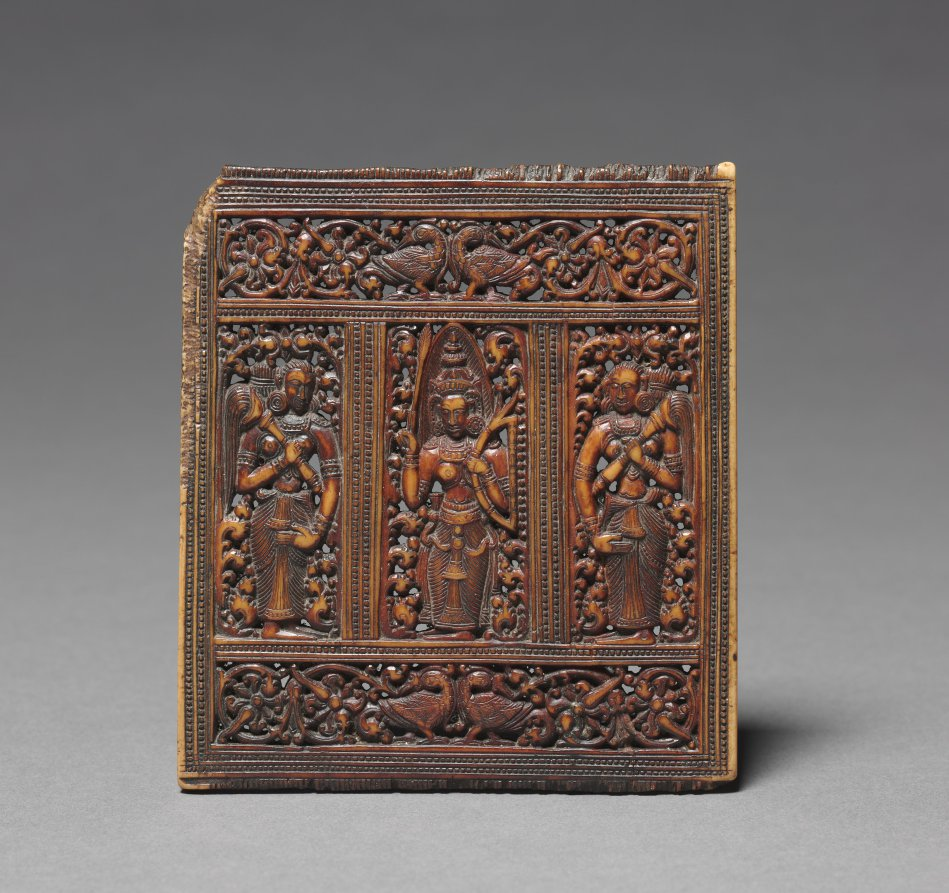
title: Comb with Devi and Attendants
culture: Ceylon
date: 1600s–1700s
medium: ivory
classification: Ivory